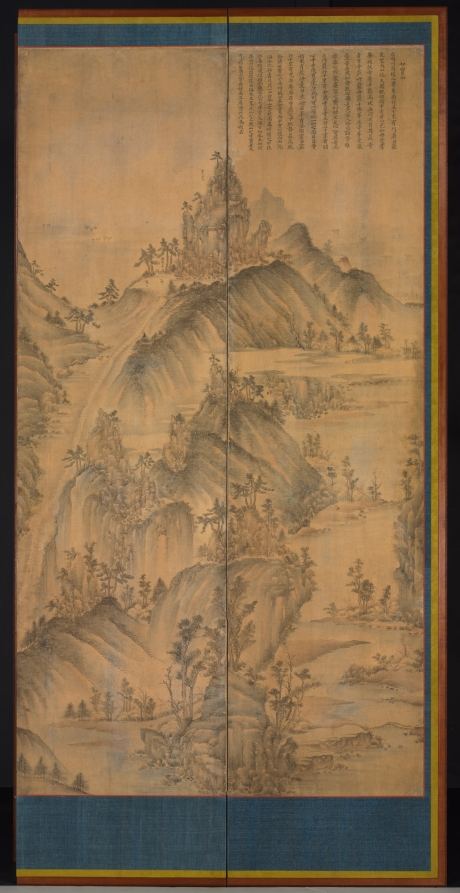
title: Seven Jeweled Mountain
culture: Korea, Joseon dynasty (1392–1910)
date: late 1800s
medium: ten-panel screen; ink and color on silk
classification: Painting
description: With a bird’s-eye view, this ten-panel folding screen portrays the famous Seven Jeweled Mountain 칠보산 in North Korea. Ancient volcanic eruptions shaped the mountain’s unique and awe-inspiring terrain such as phallic-shaped pillars (panel #5, from the right); a large flat-topped, steep-sided cliff (panels #7 and #8), and a rugged mountain composed of metamorphic and igneous rocks (panels #9 and #10). The tradition of landscape painting that details actual natural sites and captures their topographic features in Korea began in the 1700s and continued onward. While such natural wonders were beloved as popular destinations for tourism and pilgrimage, after the Korean War (1950–53), these sites in North Korea are no longer accessible to the outside world. This folding screen detailing the mountain’s distinctive topography feeds our imagination and longing for such an unattainable place.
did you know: Featuring a spectacular panoramic view and topographical details, this ten-panel folding screen is an excellent 19th-century version of the Korean “true-view” landscape painting tradition.